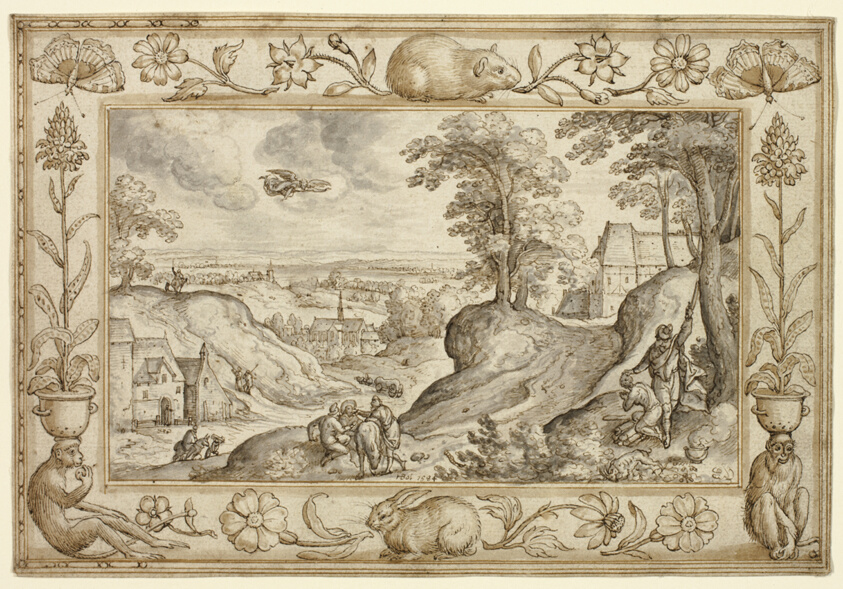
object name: Drawing and Watercolor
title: Landscape with the Sacrifice of Isaac within a Decorative Border of Plants and Animals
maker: Hans Bol (Netherlandish, 1534-1593)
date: 1584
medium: Pen and brown ink and brown and gray washes on ivory laid paper, incised with a stylus for transfer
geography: Netherlands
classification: pen and ink drawings; drawings (visual works); prints and drawing